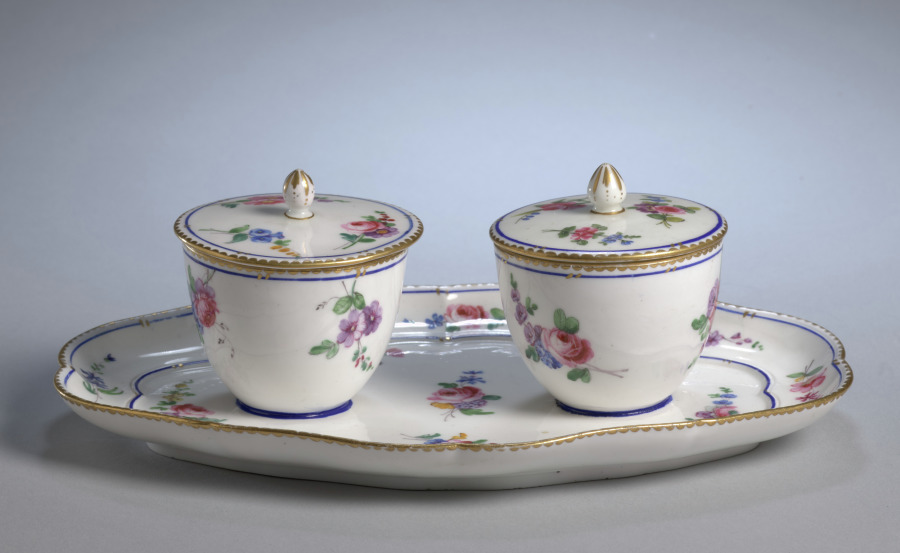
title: Jam Pots on Stand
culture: France, 18th century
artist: Sèvres Porcelain Factory (French, est. 1756)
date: c. 1760's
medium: porcelain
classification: Ceramic